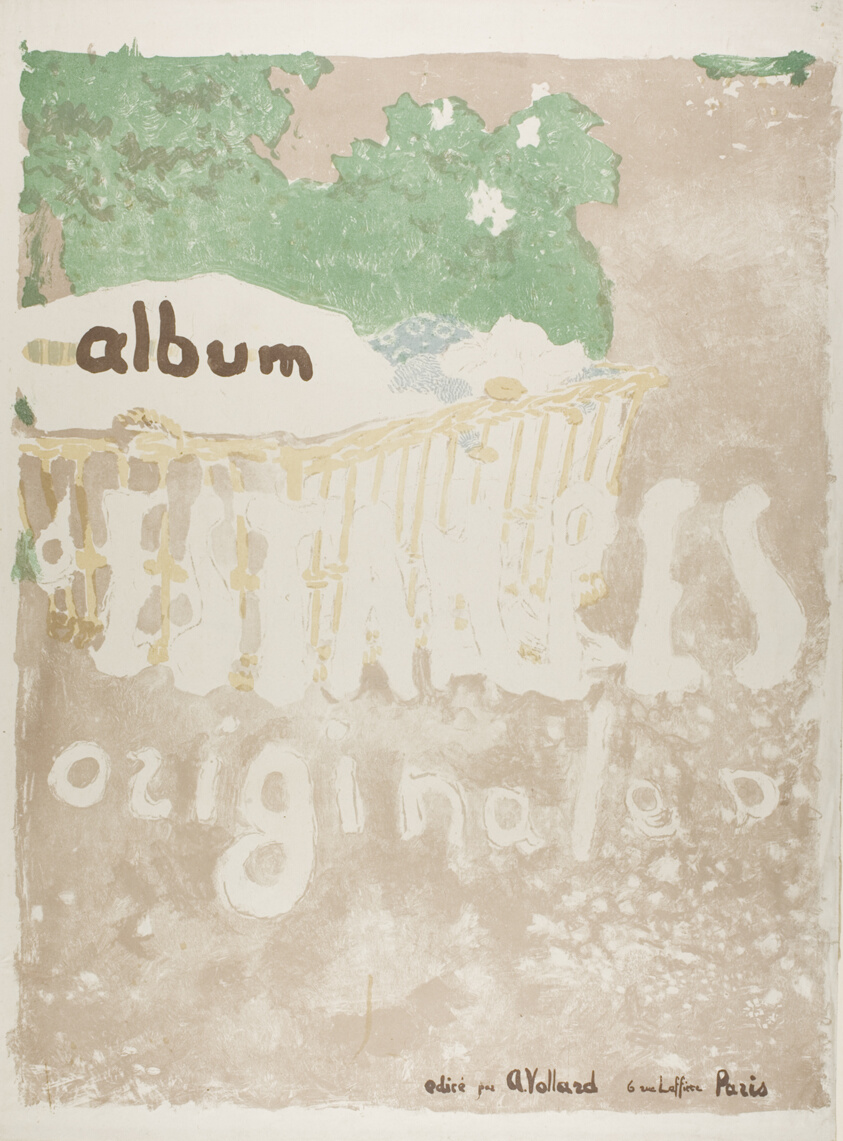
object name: Print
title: Project for a Cover of a Printed Portfolio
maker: Edouard Jean Vuillard; French, 1868-1940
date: c. 1899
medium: Color lithograph on grayish-ivory laid China paper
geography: France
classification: lithograph; print; prints and drawing